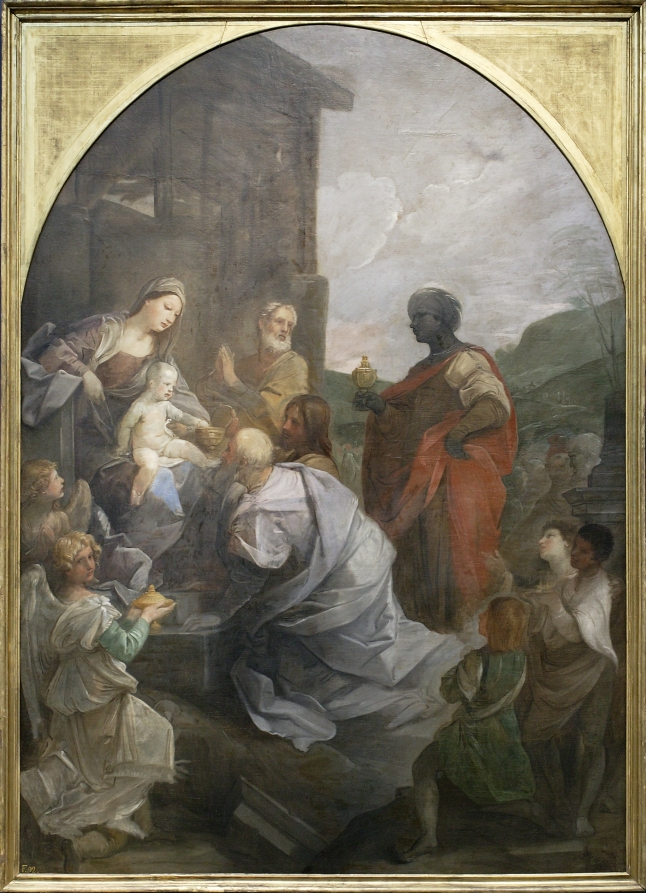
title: Adoration of the Magi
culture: Italy, 17th century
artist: Guido Reni (Italian, 1575–1642)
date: 1642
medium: oil on canvas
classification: Painting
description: This large altarpiece was in the artist's studio when he died, and parts of the composition appear incomplete. Some figures lack color, and Reni never finished the wooden structure. The silvery ground layer appears everywhere, as do his changes to the composition, such as the dog's head above the angel's right knee and the adjustment to Christ's right leg, covered in blue. However, Reni's death does not fully explain the unfinished quality. Toward the end of his career, he increasingly painted in a loose and sketchy manner—popular with collectors at the time—an approach implying that concrete forms could never depict the ideal, spiritual world Reni aimed to present.